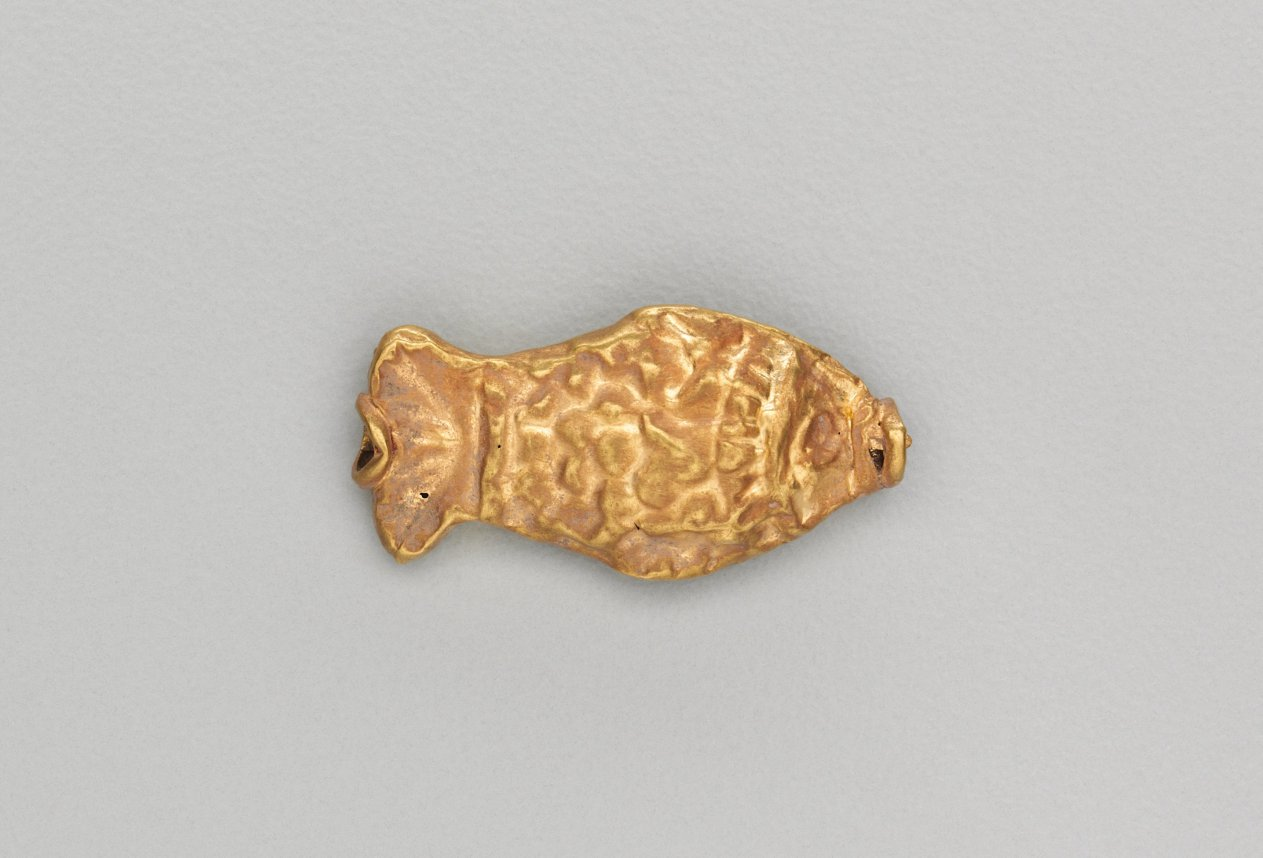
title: Necklace Bead in the Form of a Fish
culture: India, Shunga period (185–78 BCE)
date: 185–72 BCE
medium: gold repoussé with granulation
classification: Jewelry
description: Jewelry in ancient India often consisted of elements associated with water, such as fish and other aquatic plants and animals. Since water is essential for life, imagery that connotes water is life-affirming, or auspicious, and therefore appropriate adornment.